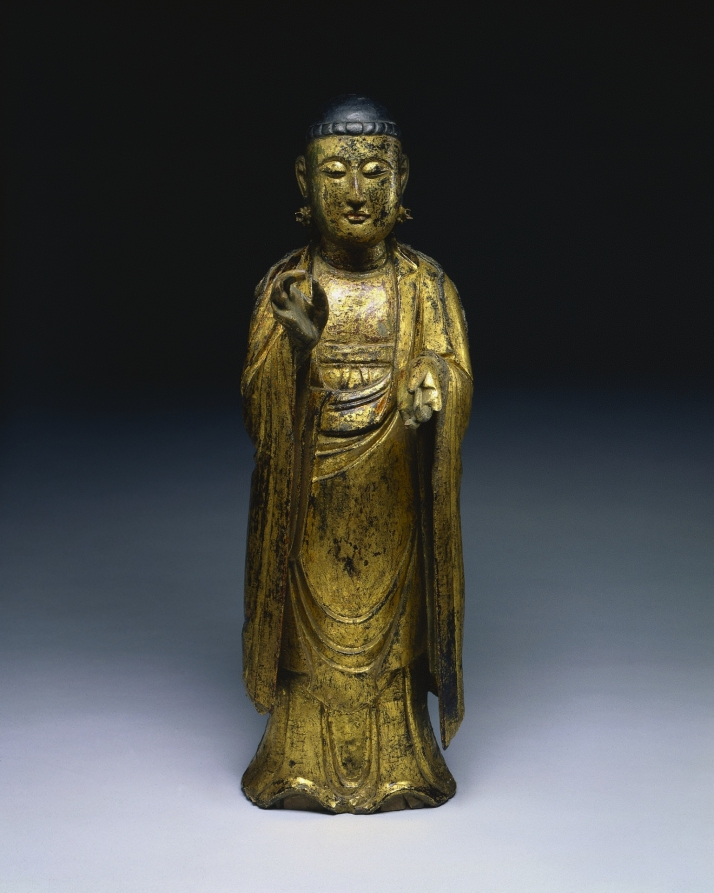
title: Standing Bodhisattva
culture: Korea, Joseon dynasty (1392–1910)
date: 1500s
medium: wood with lacquer and gold, and metal earrings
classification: Sculpture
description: This work demonstrates the enduring presence of Buddhism and its religious practice during the Joseon dynasty (1392–1910) even after Neo-Confucianism, a revised form of Confucianism that emphasized self-cultivation as a path to the formation of a harmonious society and state, became the state religion. Because of its missing crown, it is hard to identify what Buddhist deity this statue represents. But there is no doubt it still can be attributed to a bodhisattva (meaning “enlightened being”) for its iconographic attributes: elaborate jewelry and a lock of long hair.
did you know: This Buddhist statue is missing its crown, which makes it hard to identify what deity it represents.